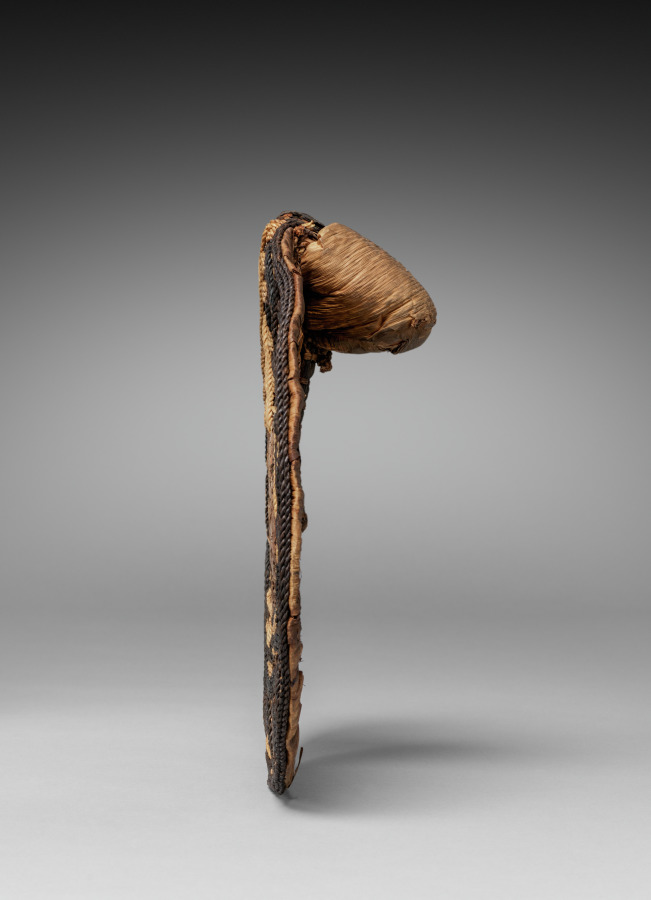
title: Back Skirt/Sitting Pad (negbe)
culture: Africa, Central Africa, Democratic Republic of Congo, Mangbetu-style makers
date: by 1928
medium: Plant fibers and dye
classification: Garment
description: Egbe (singular: negbe) were fashionable and practical garments aristocratic Mangbetu women made for special occasions. Worn over a skirt, it tied onto a girdle along with a frontal “apron.” The curved interior piece rested on the lower back. Thickly woven, flexible natural fibers bent with the body, cushioning the wearer’s behind when sitting. When the woman was standing, the decorated flat portion faced outward, showing off bold geometric motifs. Egbe were among items sold to foreigners at the Mangbetu king’s encouragement as the Mangbetu actively constructed their self image for outsiders during the 1920s and 1930s.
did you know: A contemporary fashion in 1929, when it was purchased or collected, this egbe is now a historical document of past styles.